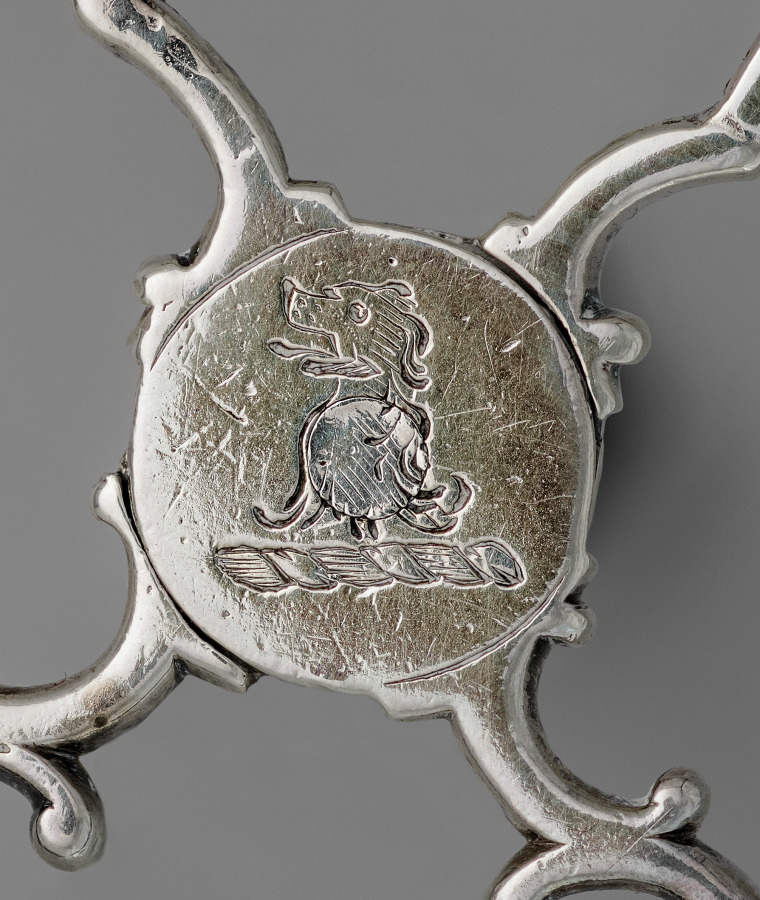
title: Sugar Scissors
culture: England, 18th century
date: c. 1750–1760 and late 19th century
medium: silver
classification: Silver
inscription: engraved Griffin crest on pivot.